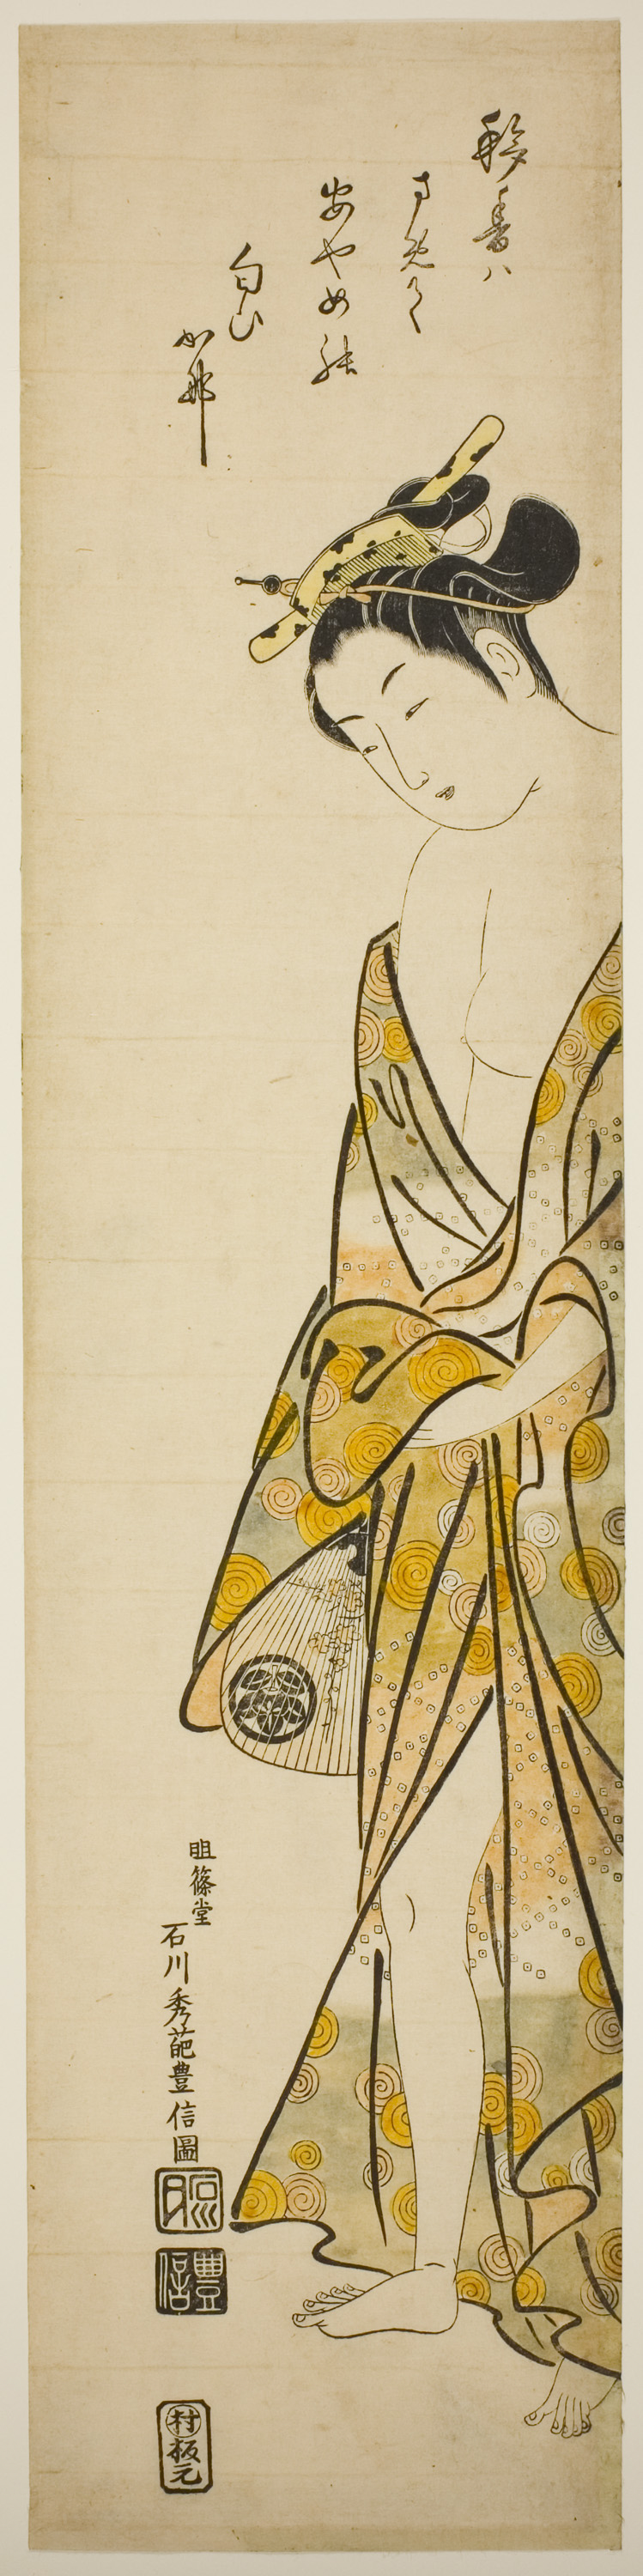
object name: Print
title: Young Woman after a Bath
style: Japanese (culture or style)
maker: Ishikawa Toyonobu (Japanese, 1711-1785)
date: c. 1745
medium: Hand-colored woodblock print; wide hashira-e, beni-e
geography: Japan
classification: woodblock print; print; asian art